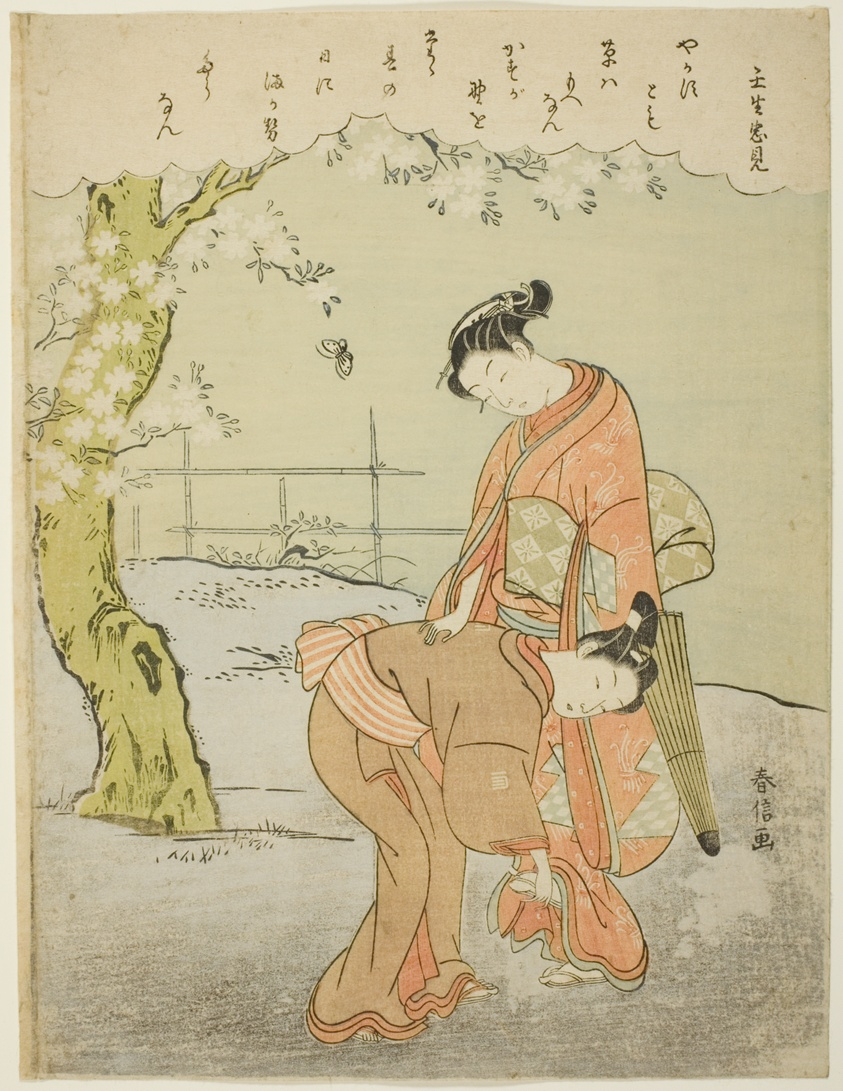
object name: Print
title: Poem by Mibuno no Tadami, from an untitled series of Thirty-Six Immortal Poets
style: Japanese (culture or style)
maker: Suzuki Harunobu 鈴木 春信; Japanese, 1725 (?)-1770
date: c. 1767/68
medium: Color woodblock print; chuban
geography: Japan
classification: woodblock print; print; asian art